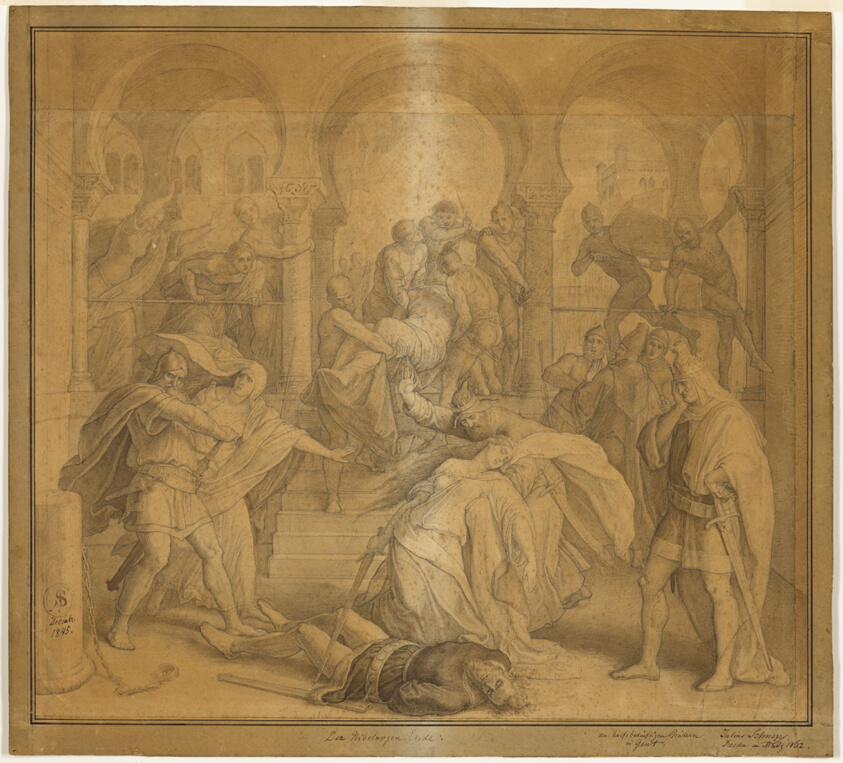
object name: Drawing and Watercolor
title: The Nibelungen's End - The Death of Kriemhild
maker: Julius Schnorr von Carolsfeld (German, 1794-1874)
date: 1845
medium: Graphite and brush and brown washes on tan laid paper, with added strip of tan wove paper at top (restoration), laid down on brown wove paper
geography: Germany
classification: graphite; drawings (visual works); prints and drawing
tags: operas/operettas, entertainment, prints and drawings